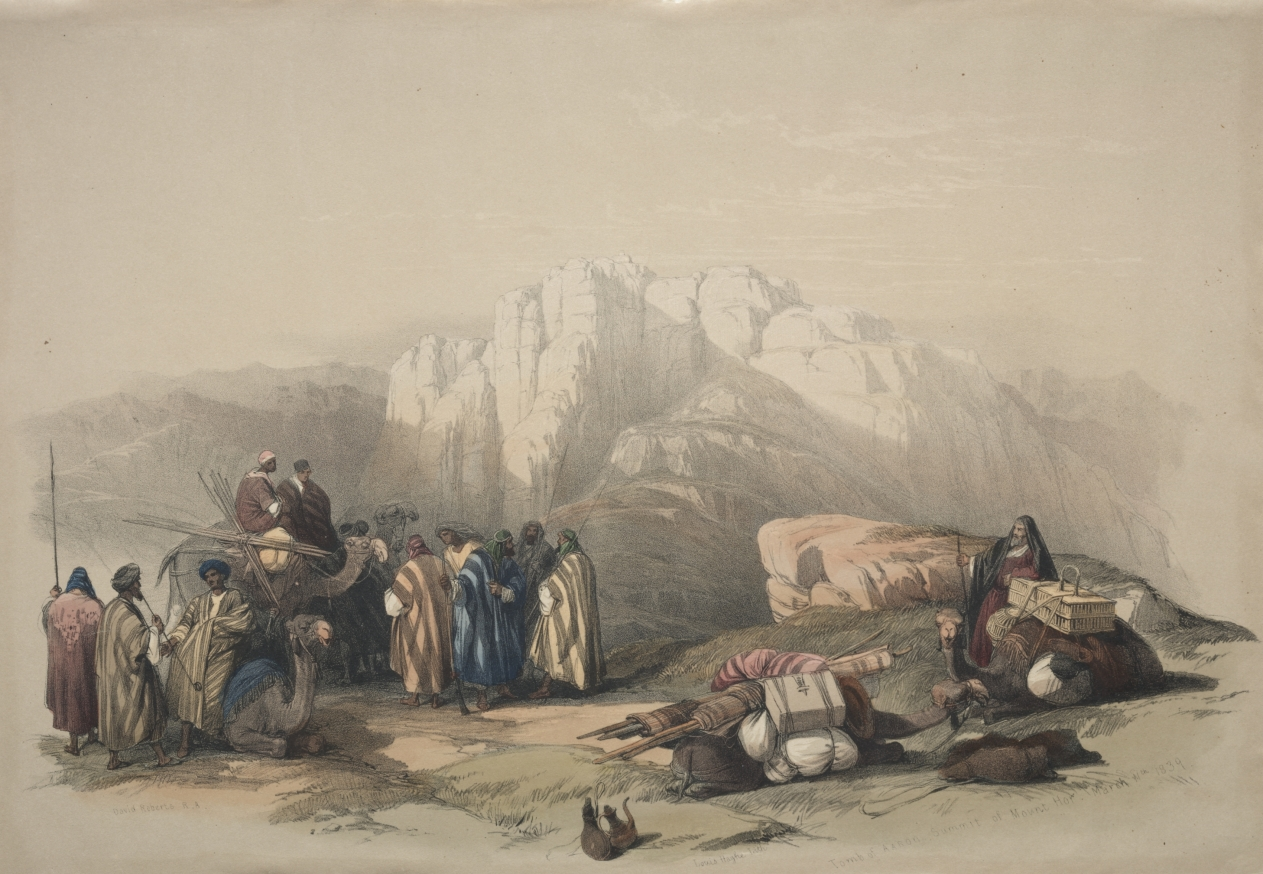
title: Tomb of Aaron, Summit of Mount Horeb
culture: England, 19th century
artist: David Roberts (Scottish, 1796–1864)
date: 1839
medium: color lithograph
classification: Print